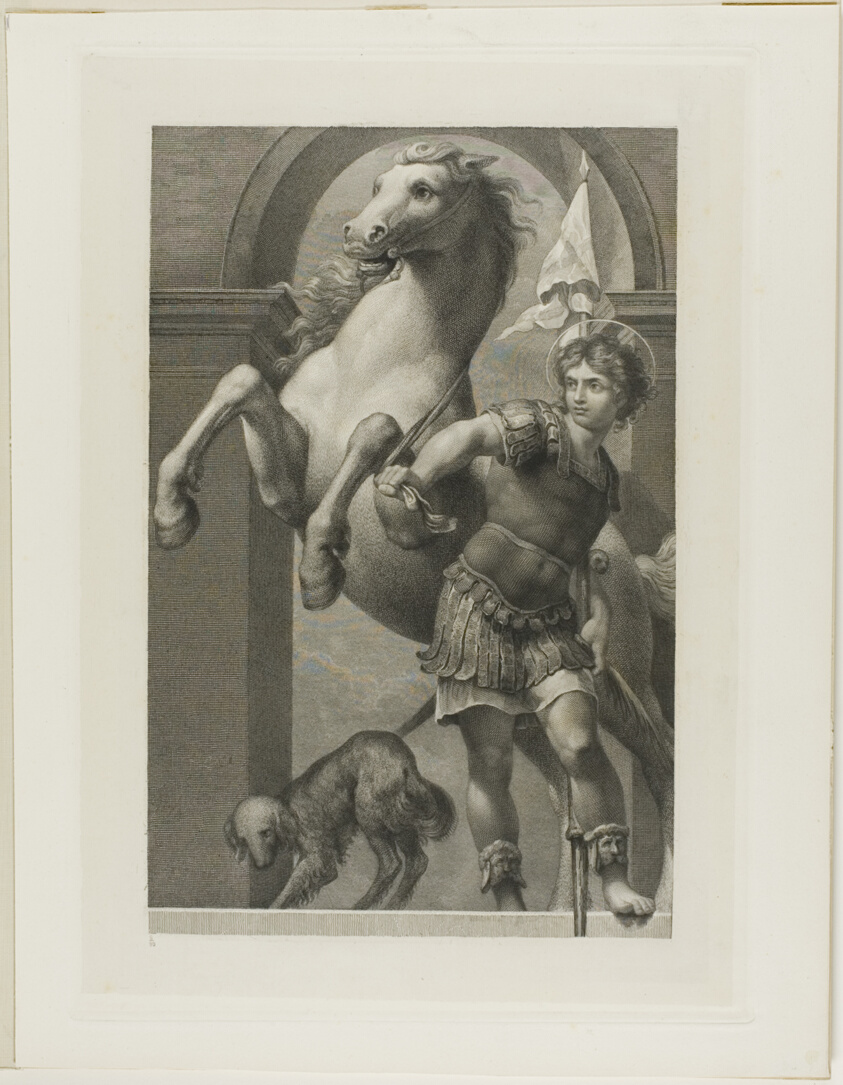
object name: Print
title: St. George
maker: Paolo Toschi; Italian, 1788-1854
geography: Italy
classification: engraving; print; prints and drawing